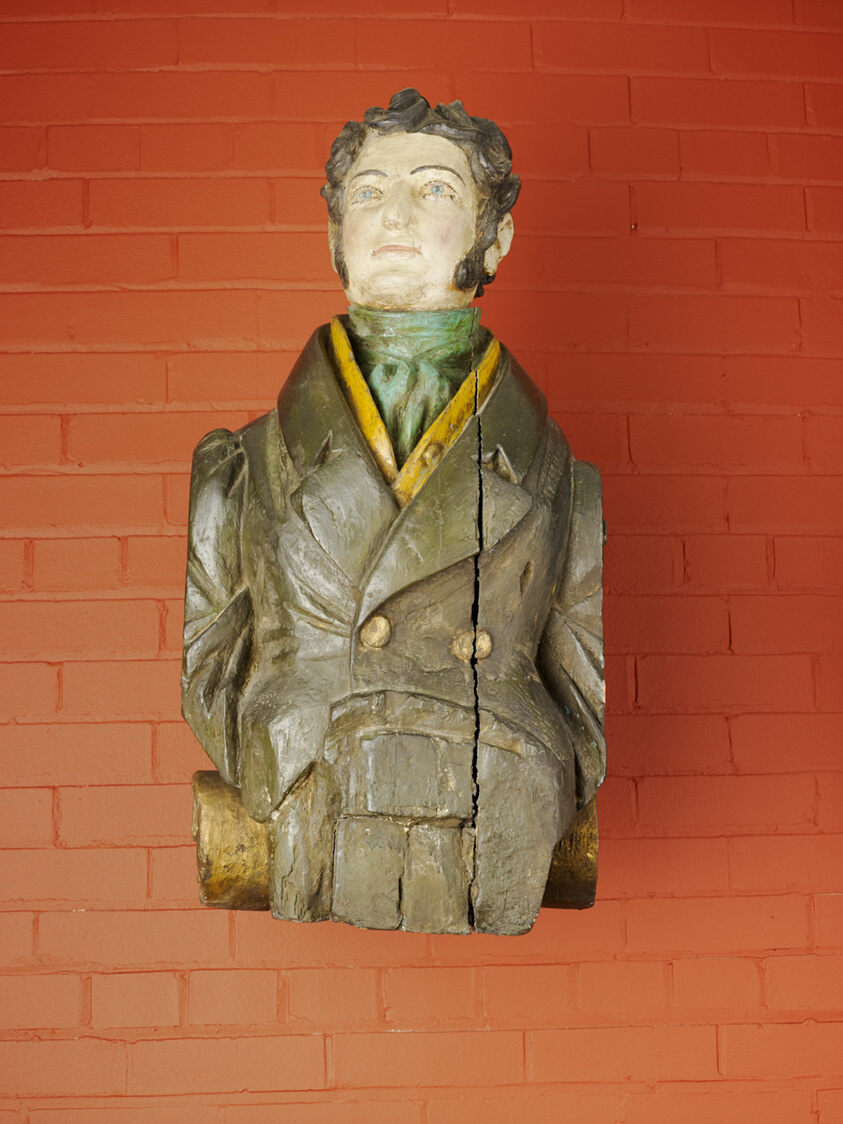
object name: Decorative Arts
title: Ship Figurehead, Male Figure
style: Folk Art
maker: Artist unknown (American, 19th century); Northeast coast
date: 1830–40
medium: Red pine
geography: Northeast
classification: sculpture; american decorative arts; american arts; decorative arts